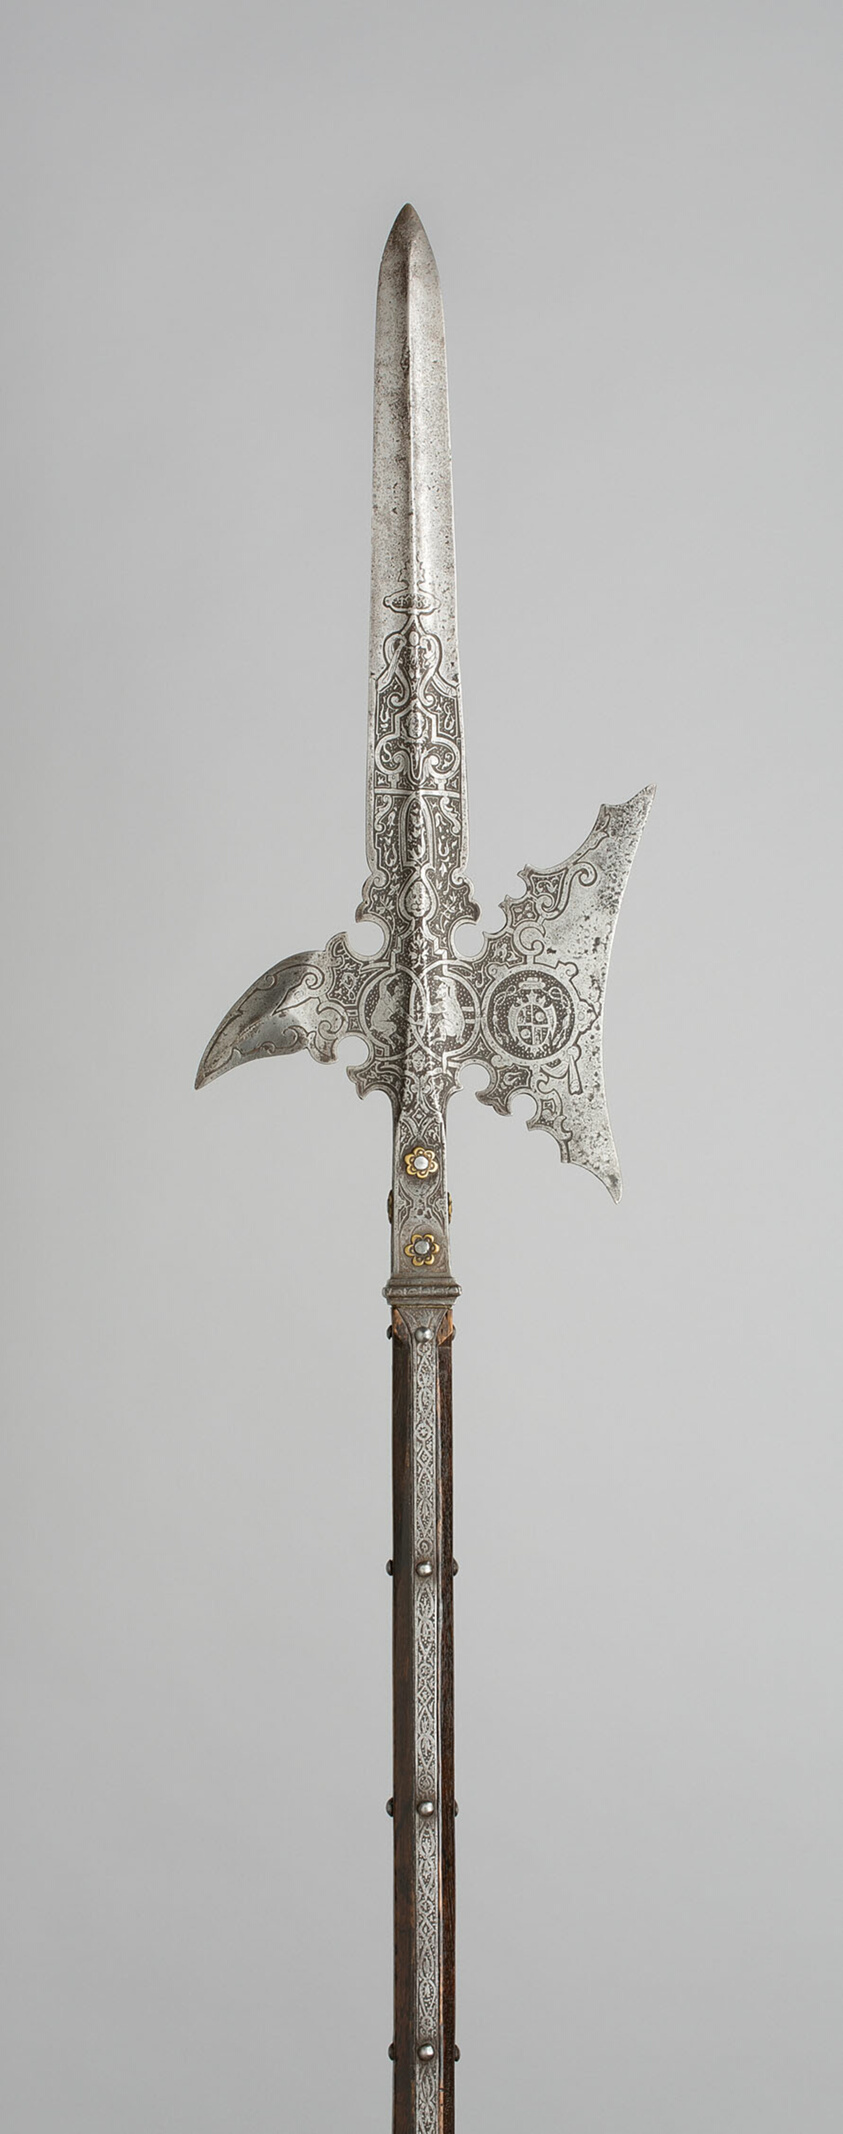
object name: Arms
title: Halberd for the Bodyguard of Wolf Dietrich von Raitenau, Prince-Archbishop of Salzburg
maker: Austrian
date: 1589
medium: Steel and oak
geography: Salzburg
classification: edged weapon-staff; arms; arms and armor